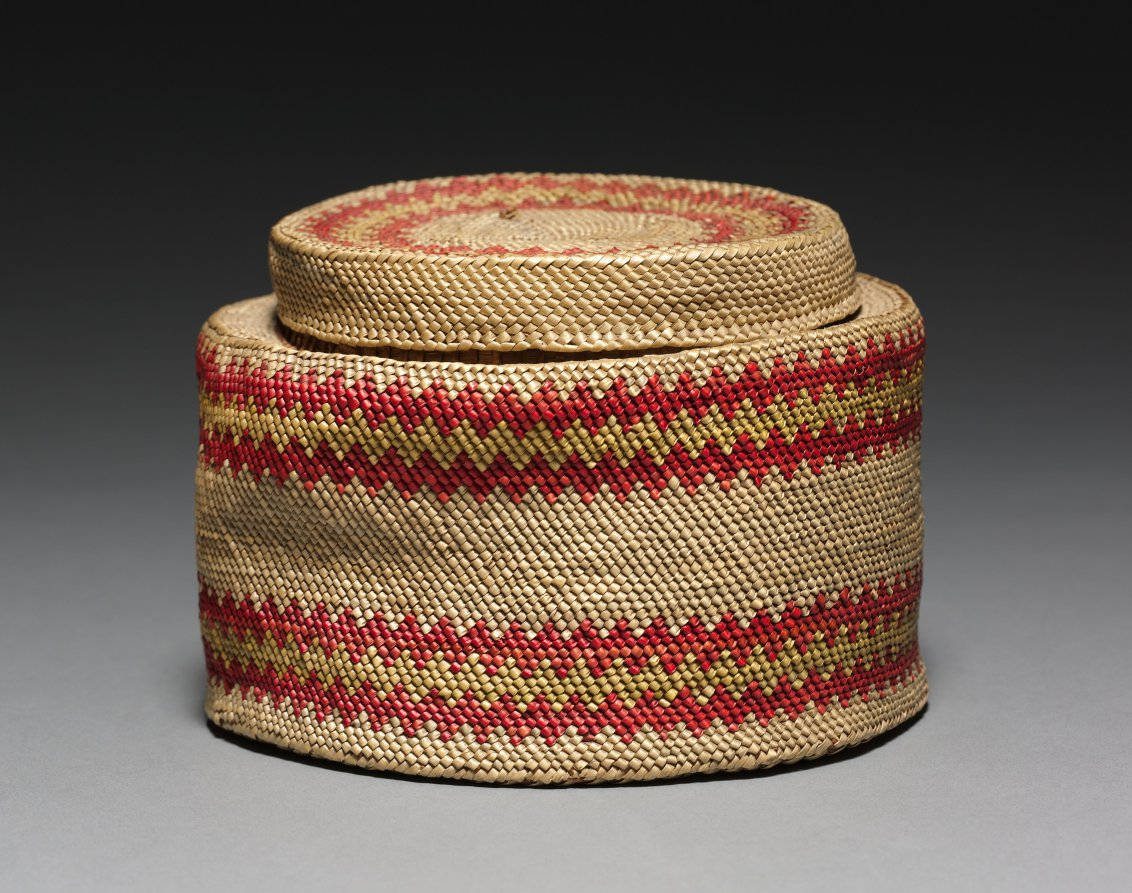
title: Ginger Jar- Shaped Basket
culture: Northwest Coast, Cape Flattery, Washington, Makah, late 19th-early 20th century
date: c 1900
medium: pear grass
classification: Basketry